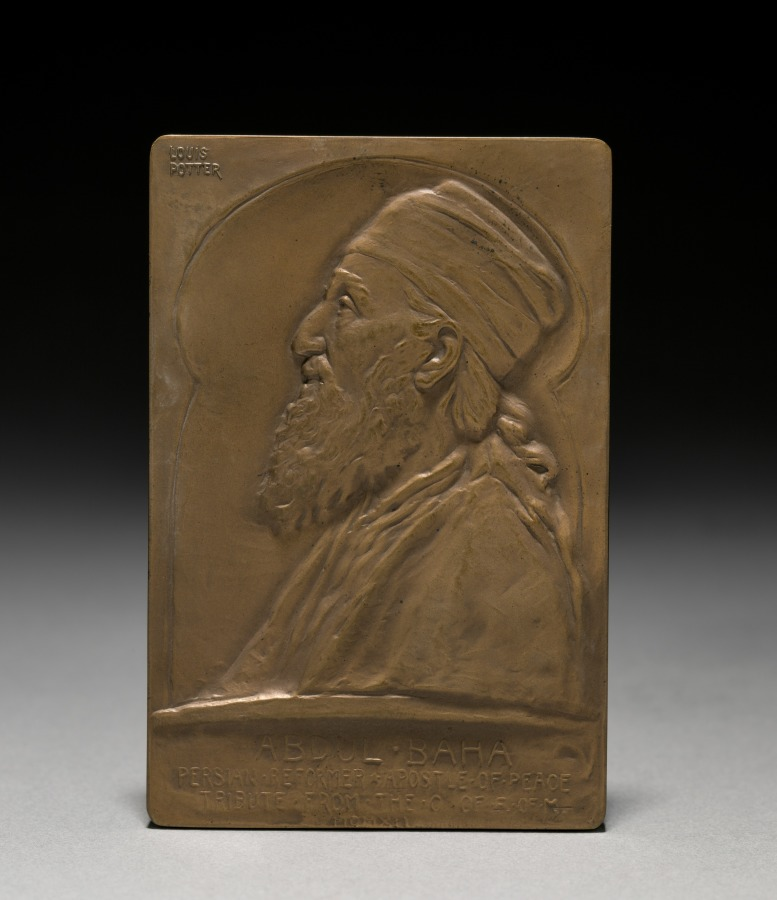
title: Medal: Abdul Baha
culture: America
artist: Louis McClellan Potter (American, 1873–1912)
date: 1912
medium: bronze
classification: Metalwork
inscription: upper left-hand corner: "LOUIS POTTER"; below, center: "ABDUL . BAHA/ PERSIAN REFORMER. APOSTLE OF PEACE/ TRIBUTE FROM THE C. OF F. OF M./MCMXII."